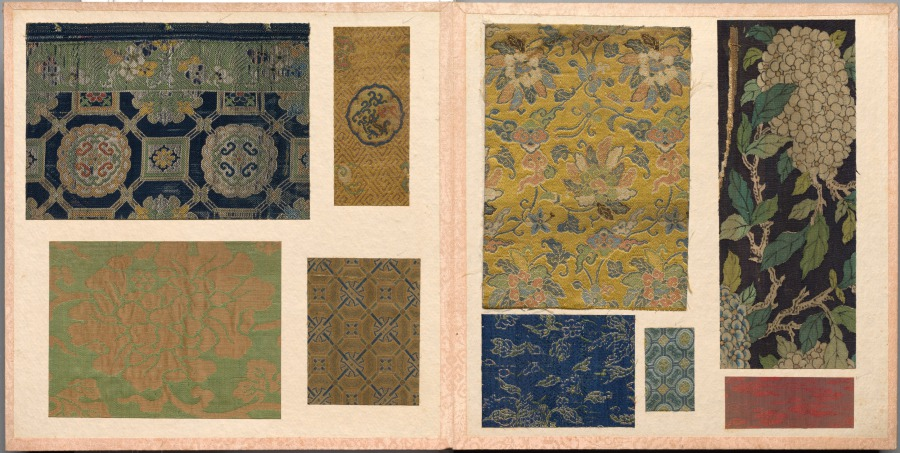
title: Album of Textile Samples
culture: Japan and China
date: 1700s–1800s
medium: silk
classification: Textile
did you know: This album contains 46 pages with 156 mounted Chinese or Japanese textile samples.